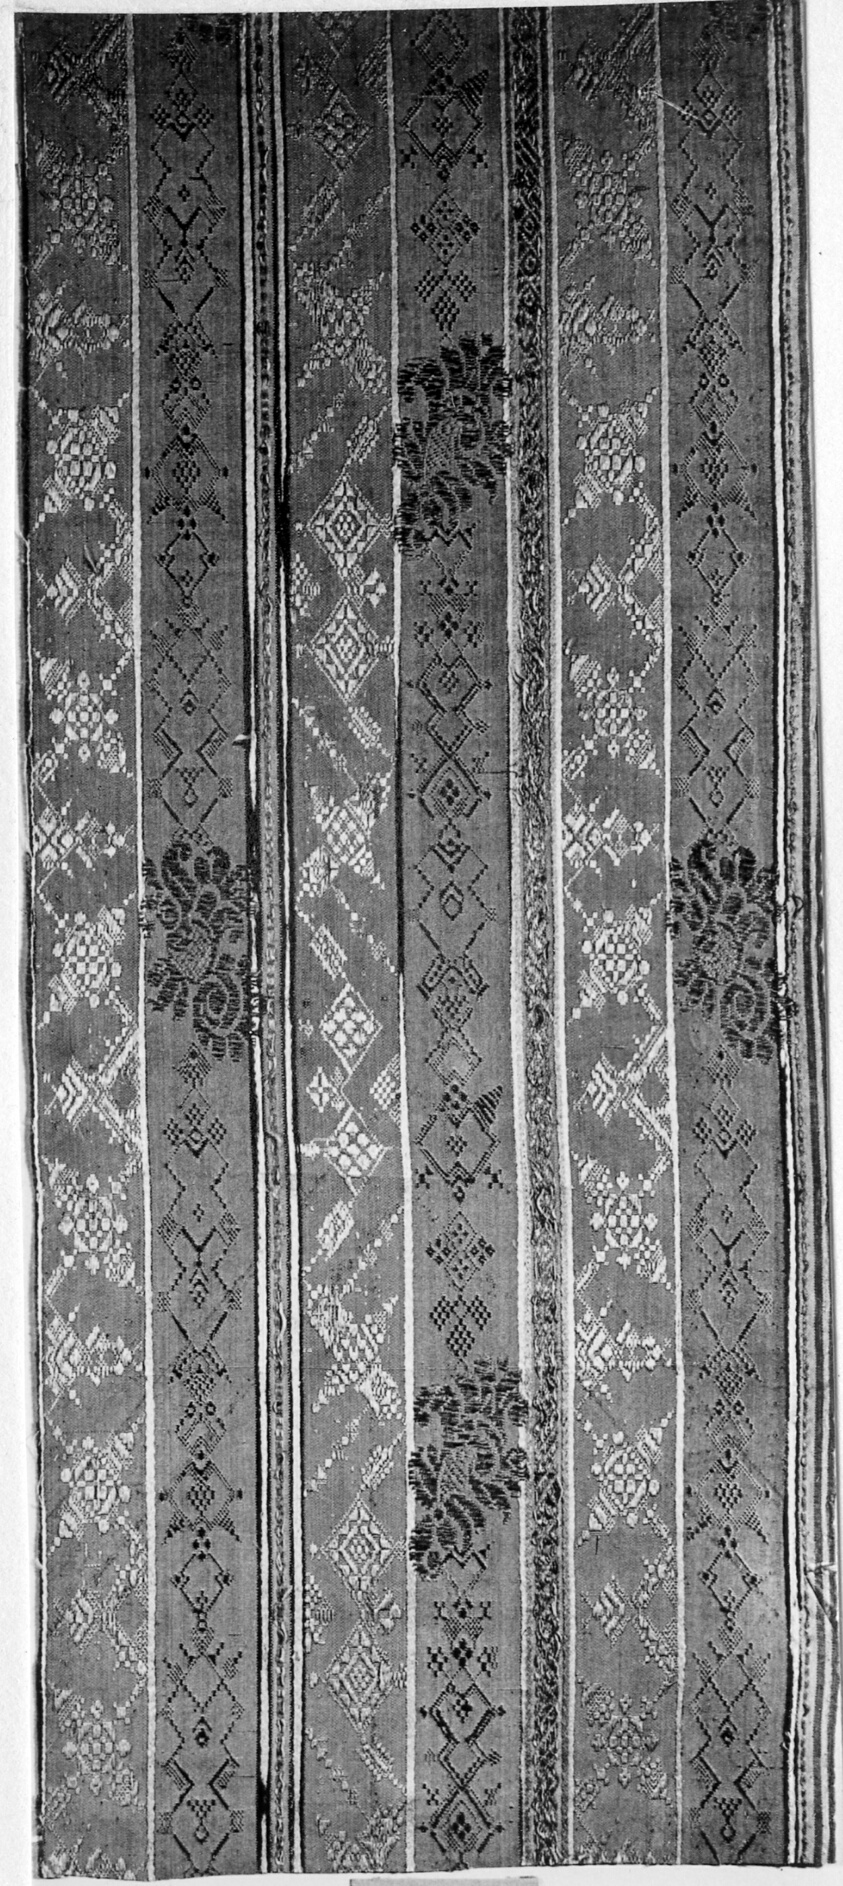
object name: Textile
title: Fragment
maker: Italy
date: Late 17th century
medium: Silk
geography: Italy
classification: textile; weaving